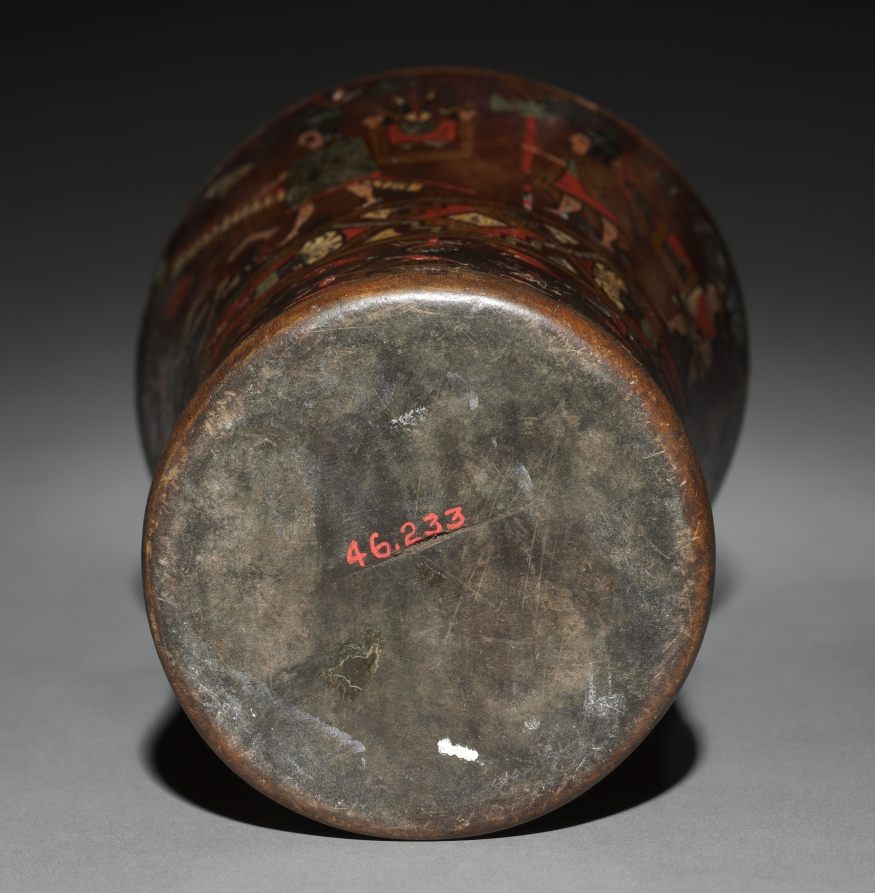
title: Kero (Waisted Cup)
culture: Peru, Colonial Inka style, 16th century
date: after 1550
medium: wood, inlaid pigments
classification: Wood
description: Keros, used to drink the maize beer chicha, were essential items of Inka statecraft. Made and used in pairs, they reflect the important Andean concept of reciprocity. Native use of keros continued in the colonial period, the date of these two examples, which come from separate pairs. The example with geometric motifs is closest to pre-conquest models. On the second, two armies converge: the Inka, dressed in tunics with waistbands, and their opponents, perhaps jungle people whose body parts are heaped in a centerpiece.